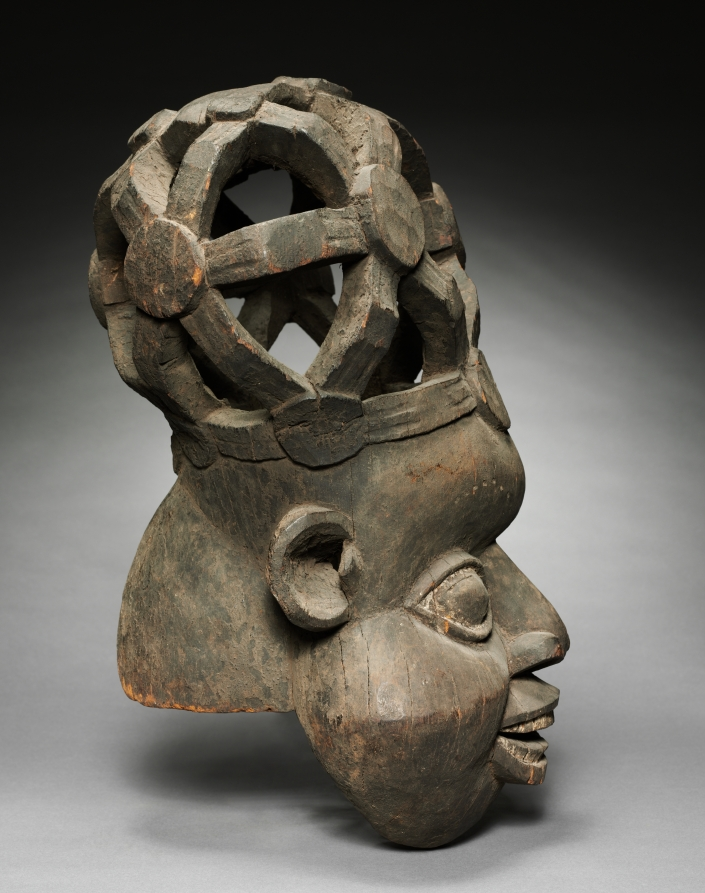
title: Helmet Mask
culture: Africa, Central Africa, Cameroon, Bamum Kingdom, Bamum-style maker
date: c. 1900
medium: Wood, kaolin, and organic materials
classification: Mask